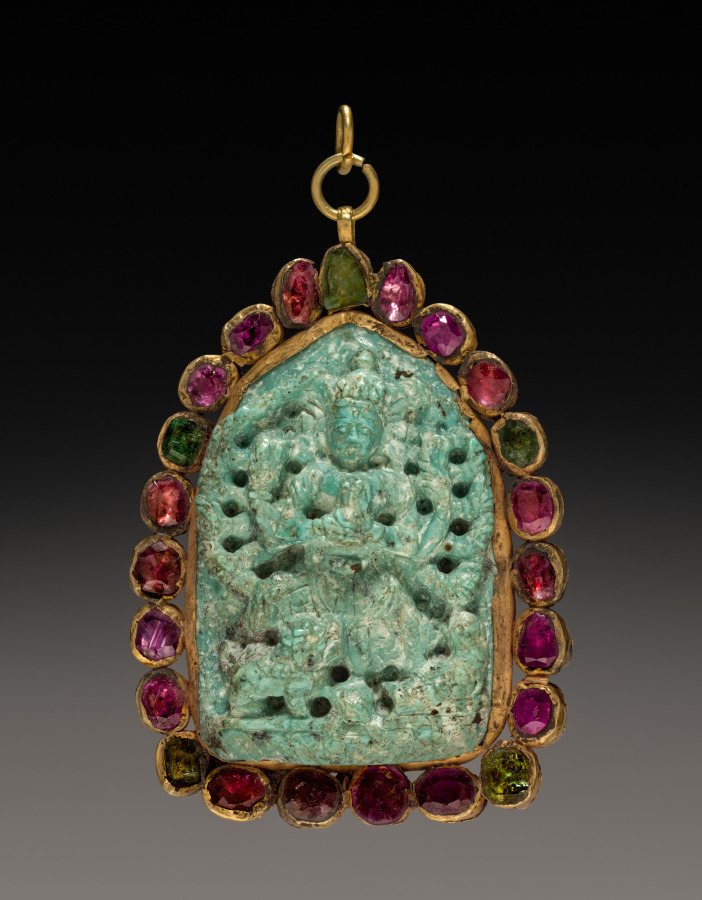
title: Pendant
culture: Tibet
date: 1800s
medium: turquoise with semi-precious stones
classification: Jewelry